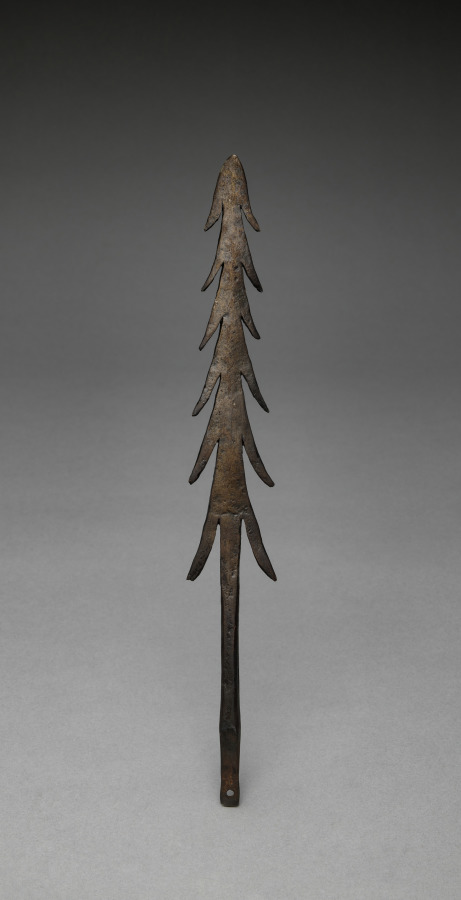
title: Barbed Spear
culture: Philippines, Northern Luzon, Ifugao, likely Lepanto area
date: before 1922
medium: Metal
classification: Arms and Armor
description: This forged iron spearhead features a long central blade and multiple paired barbs tapering in a tree-like silhouette. Its stepped barbed form aligns with spears documented in Eastern Lepanto and Northern Nueva Vizcaya.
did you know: This object most likely originated among the Igorot people, but similar spearheads are documented across the Philippine archipelago.